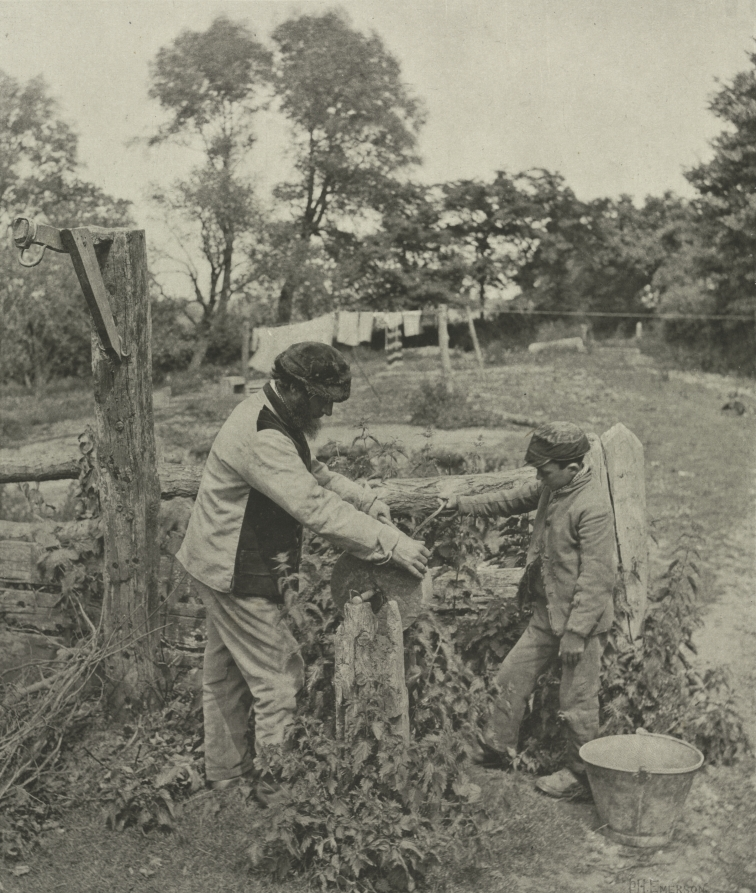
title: At the Grindstone--A Suffolk Farmyard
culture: England, 19th century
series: Pictures of East Anglian Life, pl. XXX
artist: Peter Henry Emerson (British, 1856–1936)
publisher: Sampson Low, Marston, Searle and Rivington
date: 1888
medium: photogravure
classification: Photograph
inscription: Written in negative: "P.H. Emerson"; in pencil on recto: "J"; in pencil on verso: "Med / Title [?] / on back[?]"